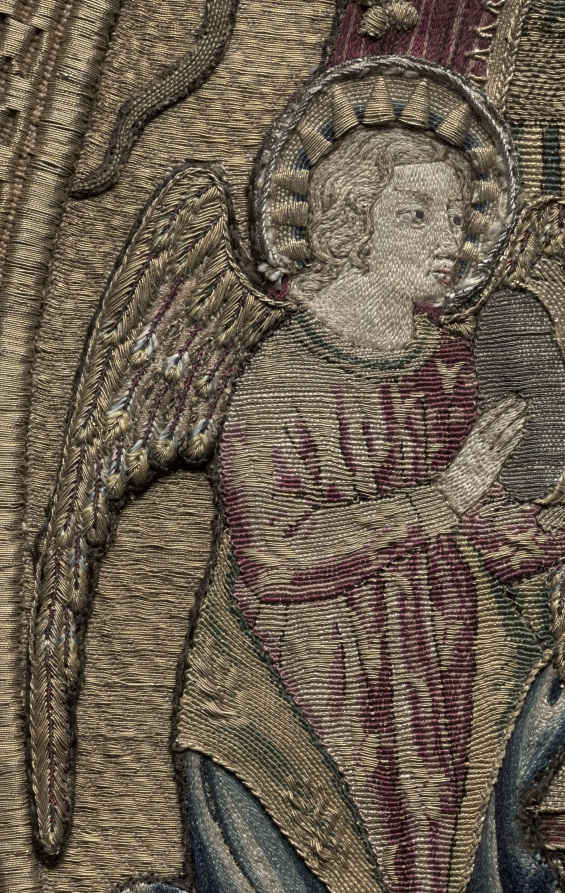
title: Embroidered Tondo from an Altar Frontal: The Coronation of the Virgin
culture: Italy, Florence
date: 1459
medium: Embroidery with gold, silver, and silk thread; split, satin, and couching stitches, or nué (shaded gold)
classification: Embroidery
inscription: the embroidery is backed by an old reused parchment with Latin writing over which in Italian is penned an inscription: "This pallioto was embroidered in the year 1486 by the venerable Margherita del Caccia nun of this monastery. . ." [It is difficult to know to what extent one should rely on this inscription as the style and technique both point clearly to an earlier date.]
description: This masterpiece of Florentine embroidery takes the circular form called a tondo and was likely once attached to an altar frontal. The scene depicts the coronation of the Virgin, the final and culminating event in the narrative cycle of her life. Honoring her as queen of heaven, Christ places the crown on his mother’s head. They are surrounded by eight angels as well as Saints Verdiana and John Gualberto, both much esteemed in Florence, creating a joyous scene. During the Renaissance, Florence emerged as an important center for a specific type of embroidery known as or nué, or shaded gold. This stunning technique used metal and silk threads, as seen here, to create pictures that rivaled paintings. It was frequently used for vestments and altar frontals.